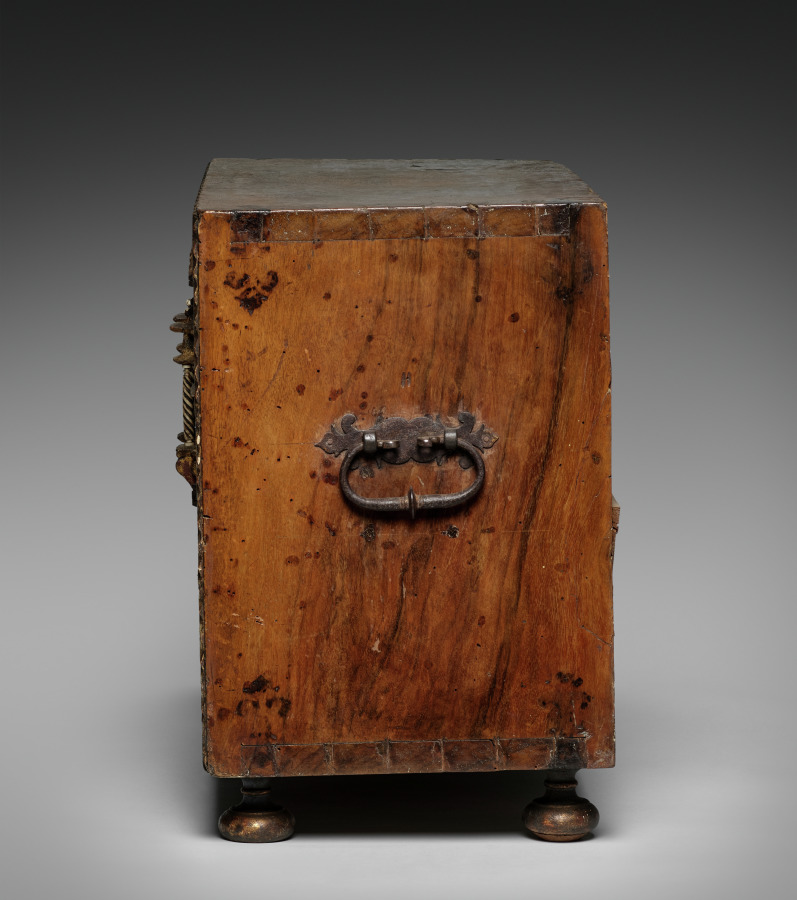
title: Chest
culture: Spain, Colonial, late 17th Century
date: late 1600s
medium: turned and joined wood, gilded and painted red with applied bone columns and bone inlays, wrought iron hardward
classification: Furniture and woodwork